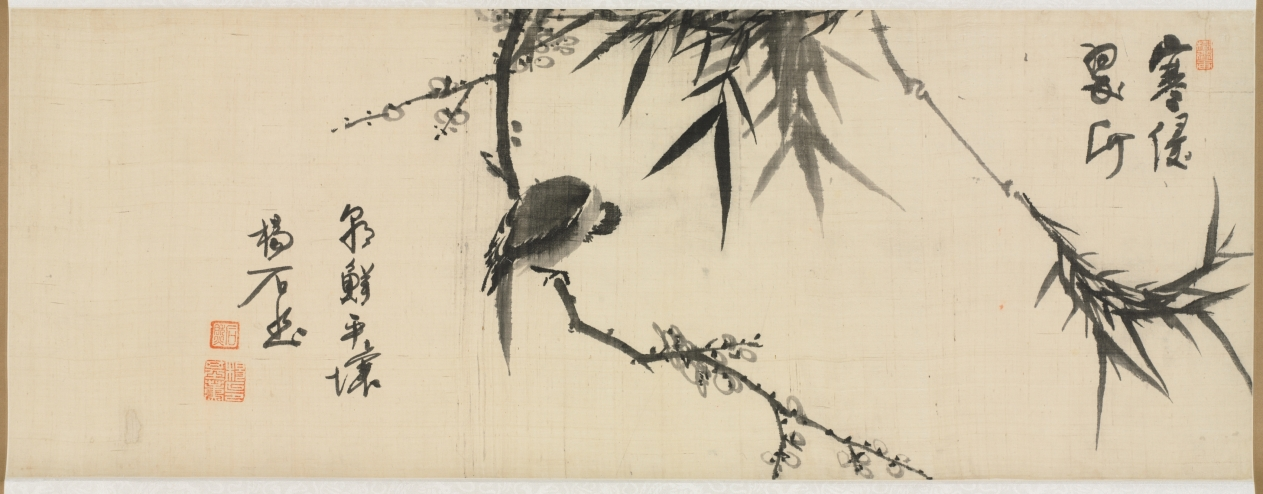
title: Bird Sleeping on a Plum Tree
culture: Korea, Joseon dynasty (1392–1910)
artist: Yang Ki-hun (Seuk-Eun) (Korean, 1843–1919?)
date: early 1900s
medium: hanging scroll, ink on silk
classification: Painting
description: The plum’s status as the orthodox symbol of the literati’s pure spirit originated in Lin Bu’s poem "Tiny Plum Flowers in Mountain Garden." The plum was also widely depicted in Korean paintings as part of the Four Gentlemen—or Four Gracious Plants—motif. Here, the plum and bamboo express literati spirituality while the bird with its head pointing downward indicates the artist’s feelings about the unstable situation at the end of the Joseon period. Yang Ki-hun was a Korean scholar-official renowned for painting and calligraphy. King Gojong (reigned 1863–1907) was one of Yang's prominent patrons.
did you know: Yang Ki-hun was one of the most commercially successful painters active in the late 19th century.